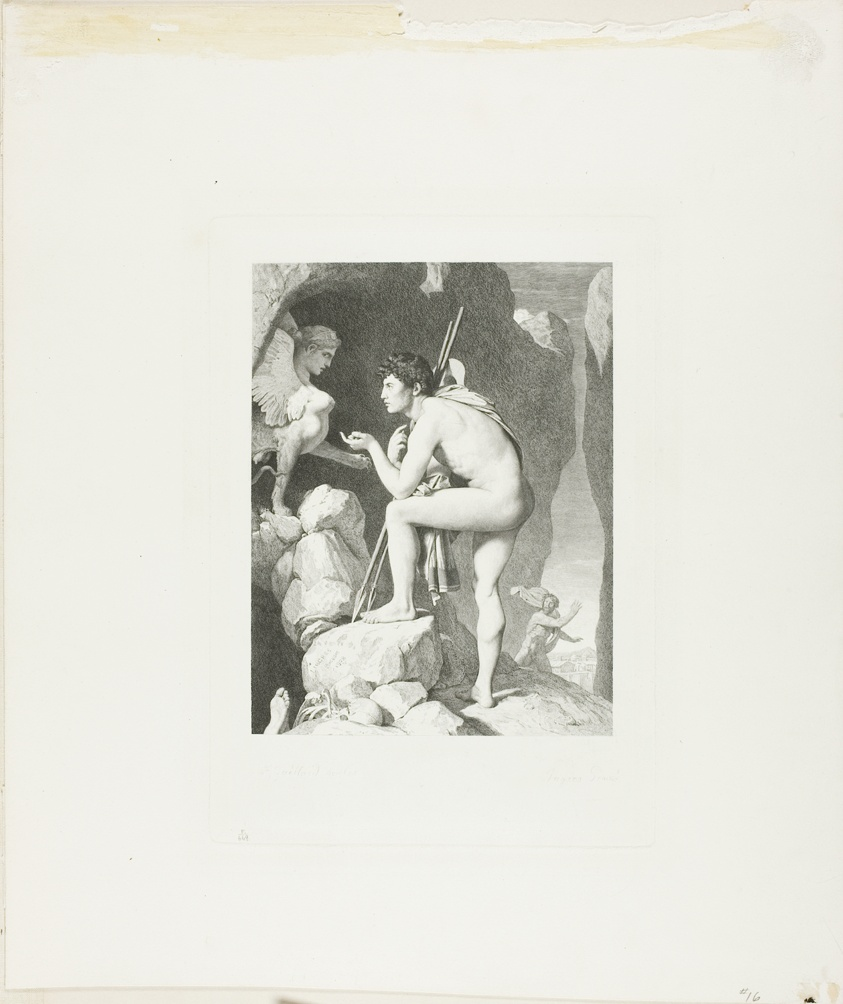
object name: Print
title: Oedipus and the Sphinx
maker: Claude Ferdinand Gaillard (French, 1834-1887); after Jean–Auguste–Dominique Ingres (French, 1780–1867)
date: 1867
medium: Engraving on ivory China paper, laid down on ivory wove paper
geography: France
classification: engraving; print; prints and drawing